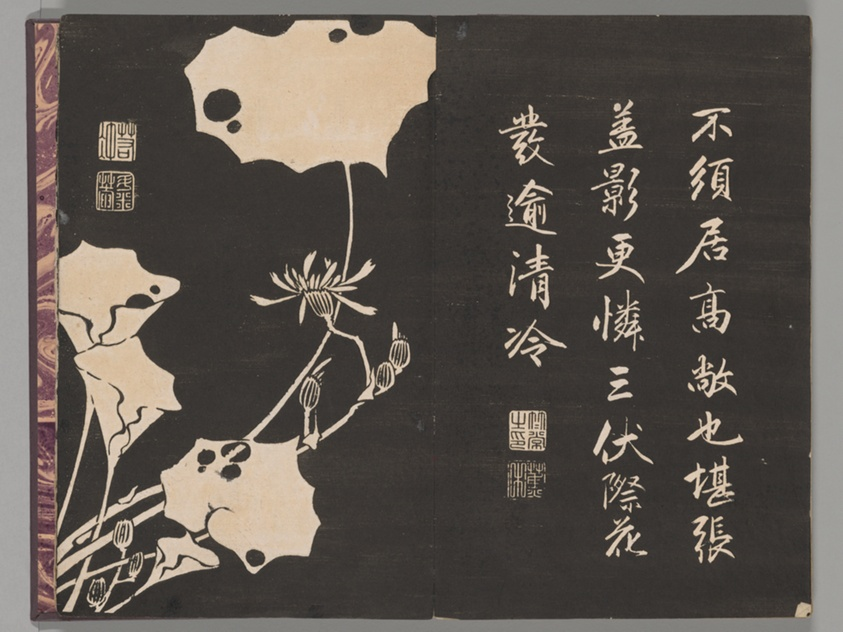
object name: Book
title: Soken sekisatsu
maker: Ito Jakuchu (Japanese, 1716-1800)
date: 1767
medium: Woodblock printed book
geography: Japan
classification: book